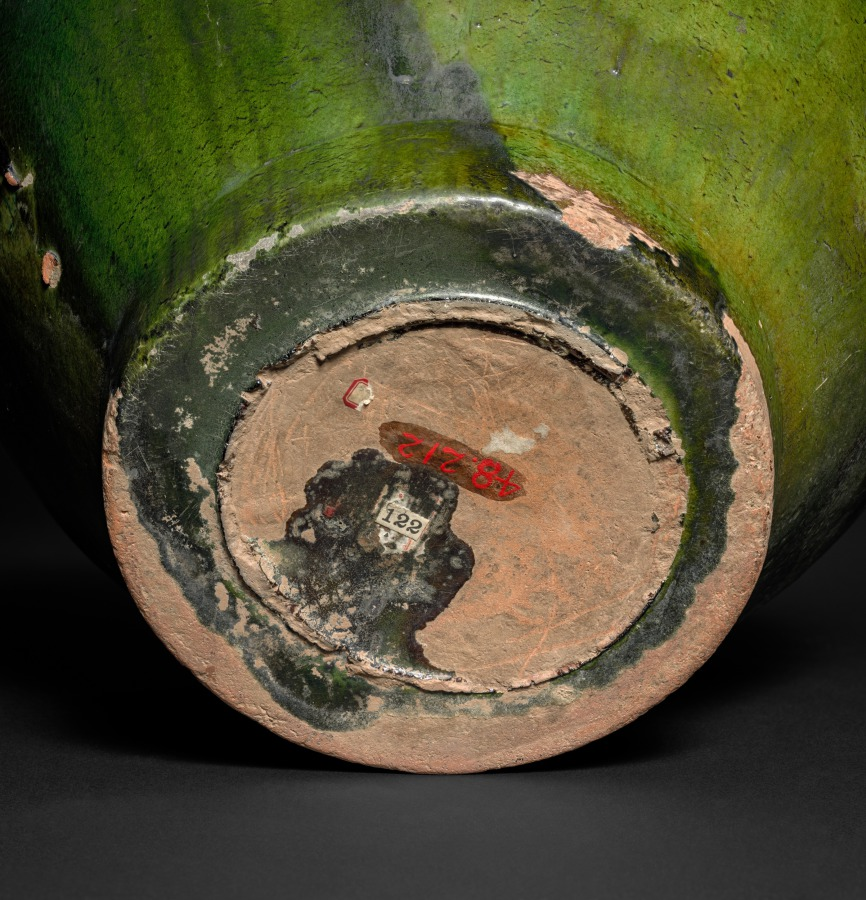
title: Large Jar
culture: China, Han dynasty (202 BCE–220 CE)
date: 206 BCE–220 CE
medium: earthenware with impressed and molded decoration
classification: Ceramic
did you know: The vase's earthenware body is covered with a cucumber-rind green glaze.